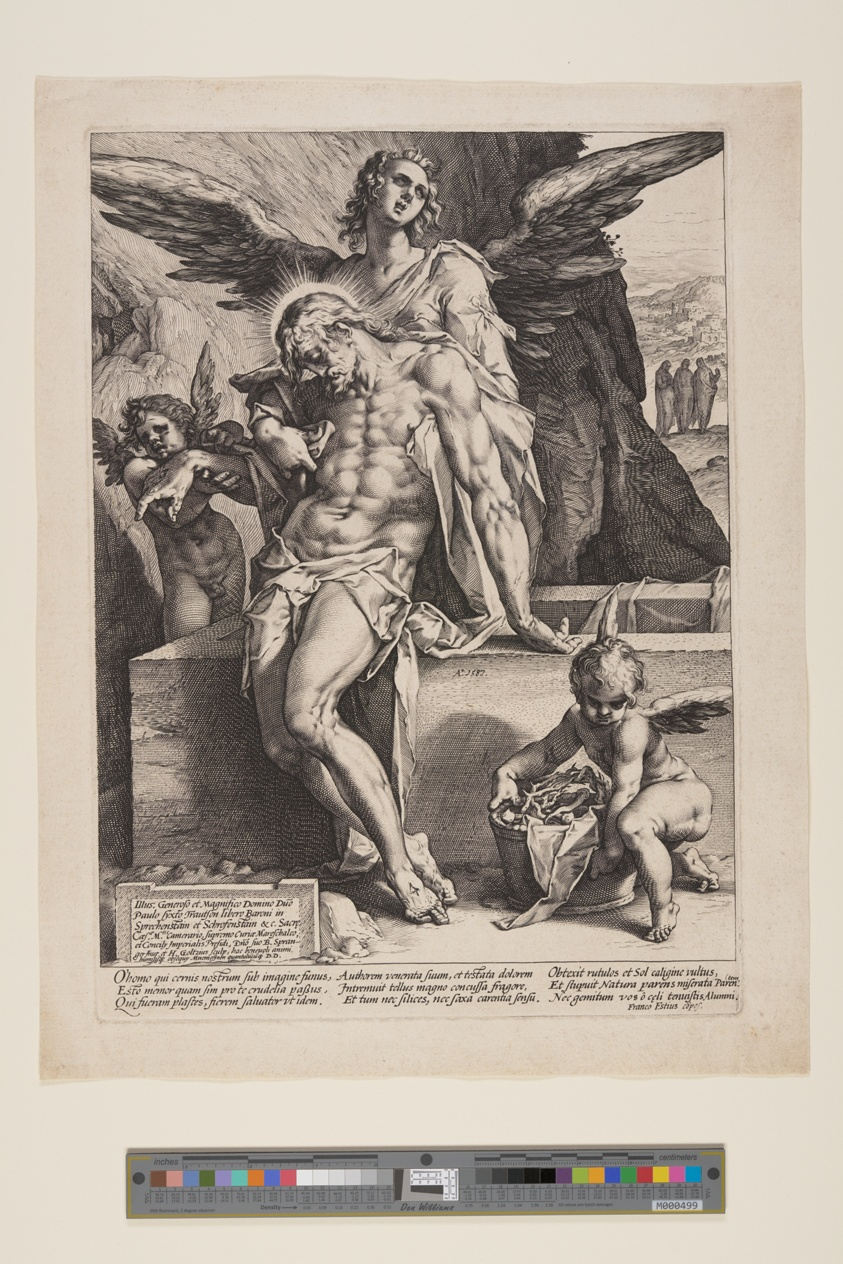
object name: Print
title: The Dead Saviour Supported by an Angel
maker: Hendrick Goltzius (Dutch, 1558–1617); after Bartholomeus Spranger (Flemish, 1546–1611)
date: 1587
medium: Engraving on ivory laid paper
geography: Netherlands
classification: print; paper; prints and drawing; engraving